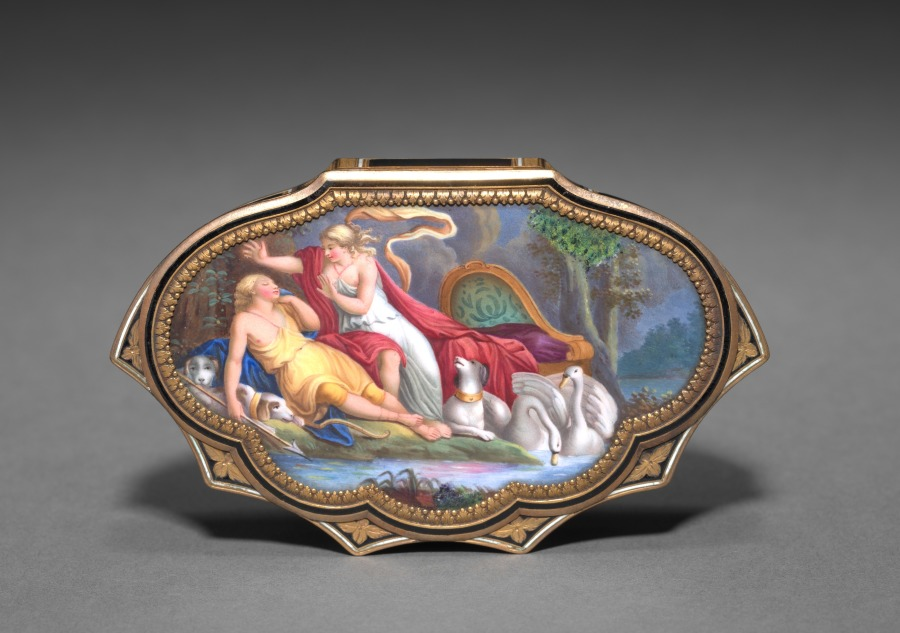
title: Box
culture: Switzerland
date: early 1800s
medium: gold and enamel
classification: Enamel